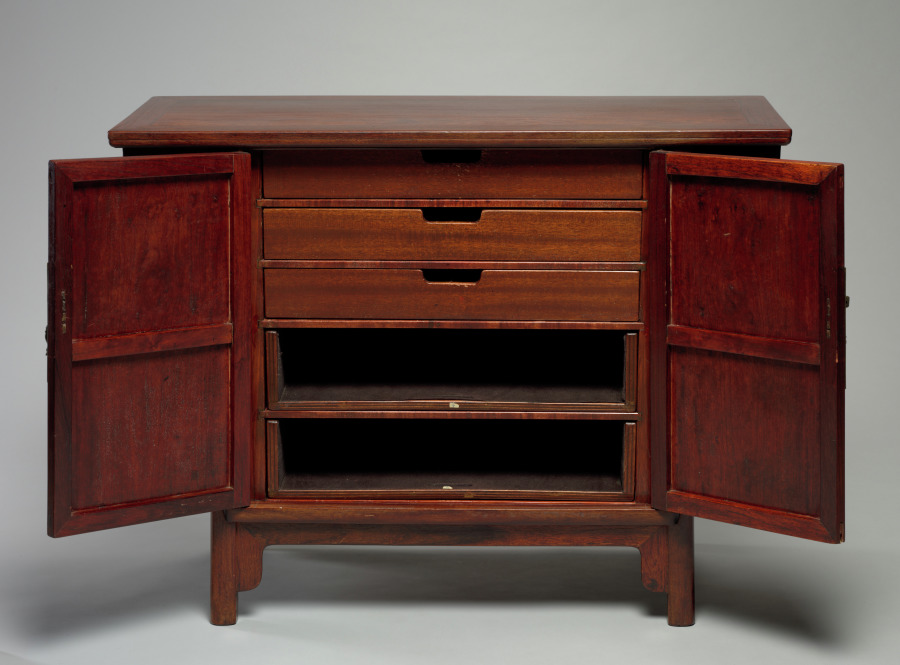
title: Table Top Cupboard: Gui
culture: China, Ming dynasty (1368–1644)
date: 1500s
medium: Rosewood (huanghuali)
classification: Furniture and woodwork